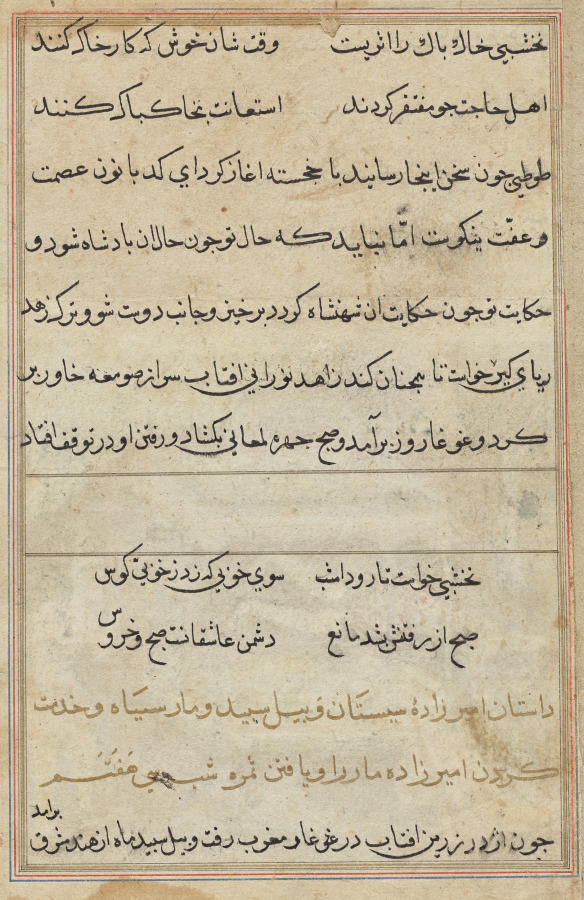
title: Page from Tales of a Parrot (Tuti-nama): text page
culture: Mughal India, court of Akbar (reigned 1556–1605)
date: c. 1560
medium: gum tempera, ink, and gold on paper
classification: Painting